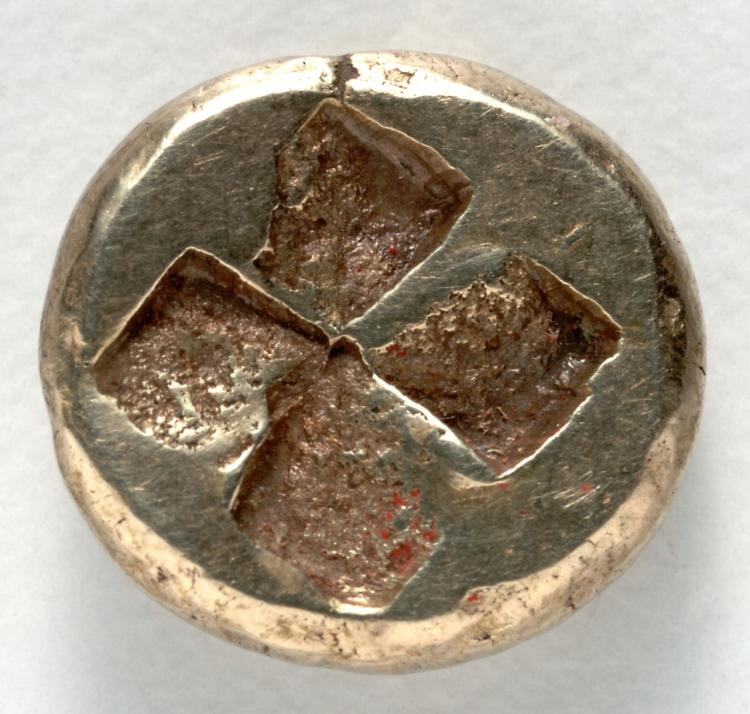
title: Hecte: Incuse Square, Quartered (reverse)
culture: Greek, minted at Phokaia (Ionia)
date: 387–326 BCE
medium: electrum (gold-silver alloy)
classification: Coins